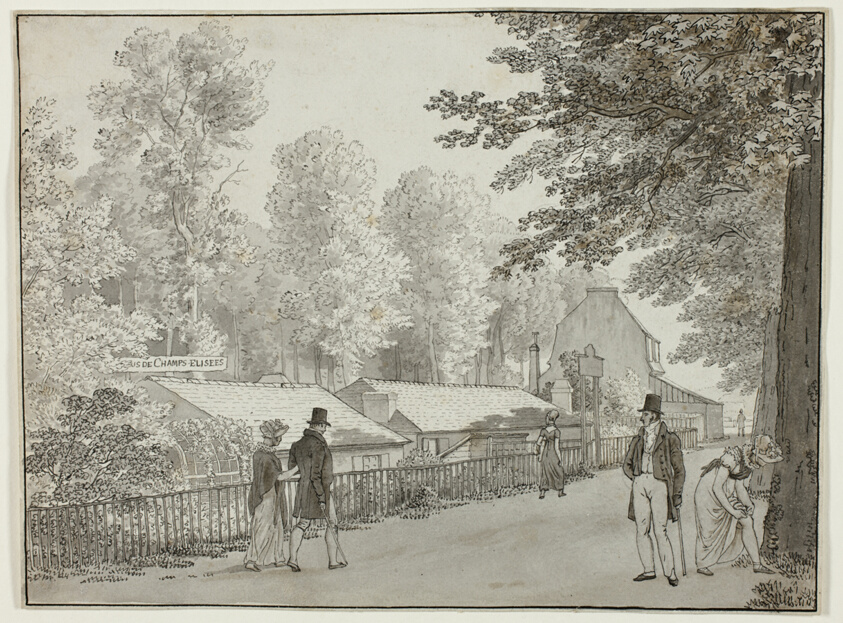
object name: Drawing and Watercolor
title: Relais, Avenue des Champs-Élysées, Paris (recto); Scene from the Life of Odysseus (verso)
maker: Christoffer Wilhelm Eckersberg (Danish, 1783-1853)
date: 1812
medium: Pen and black ink, with brush and gray and brown washes, over graphite (recto); graphite and pen and black ink (verso) on off-white wove paper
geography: Denmark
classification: pen and ink drawings; prints and drawing; paper